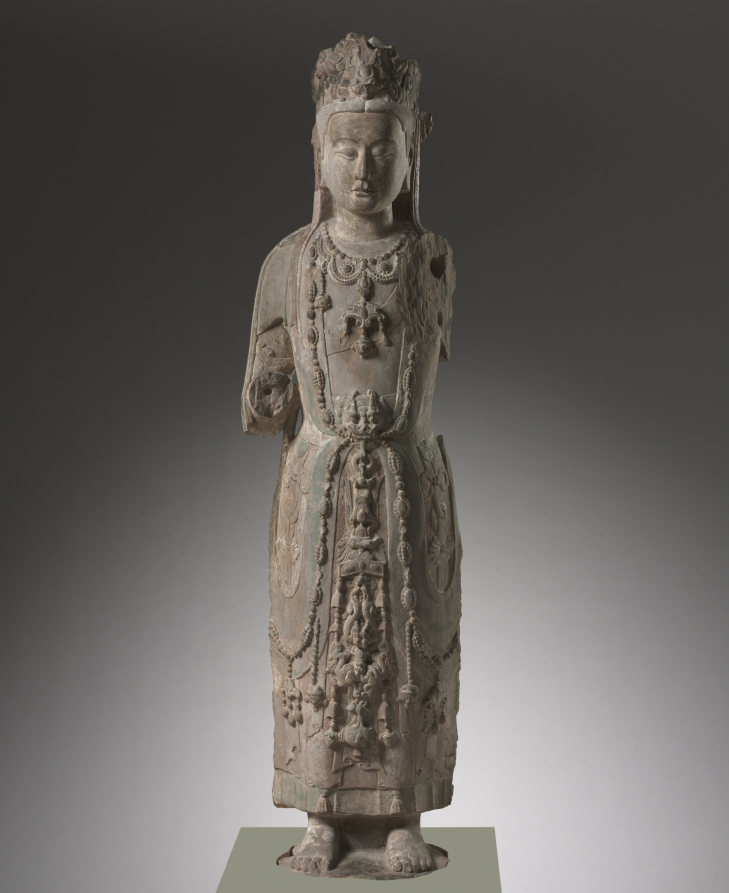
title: Bodhisattva Guanyin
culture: China, late Northern Qi (550–577) or early Sui dynasty (581–618)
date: late 500s–early 600s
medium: sandstone with polychromy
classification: Sculpture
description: The artistic excellence of this bodhisattva is further reinforced by comparable outstanding Chinese Buddhist sculptures excavated at Qingzhou in Shandong Province in 1996—one of the most sensational and significant archaeological finds of the 1900s. Like related types among the Qingzhou finds, this statute has a gently smiling face and meticulous detailing of splendid jewelry. A noticeable difference, however, is the unique yingluo 瓔珞 (mukt hara) worn by the bodhisattva for personal adornment. The somewhat bizarre but imaginative combination of a string of jewels with grotesque animal masks, flying apsara, jade pendants, dragons, and metal ornaments was probably a regional decorative style of Shanxi Province.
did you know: The carved and painted back suggest that the bodhisattva was originally displayed where it could be viewed in the round.